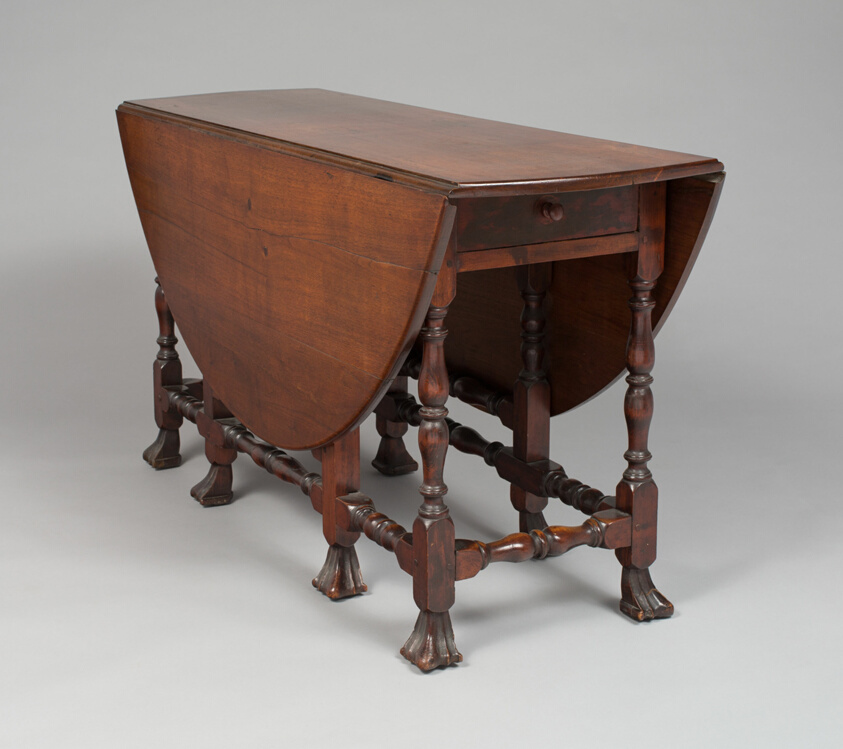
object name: Furniture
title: Gate Leg Table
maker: Artist unknown (American, 18th century); Boston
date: 1710–30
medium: Walnut and pine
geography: Boston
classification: table; furniture; american decorative arts; american arts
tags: furniture